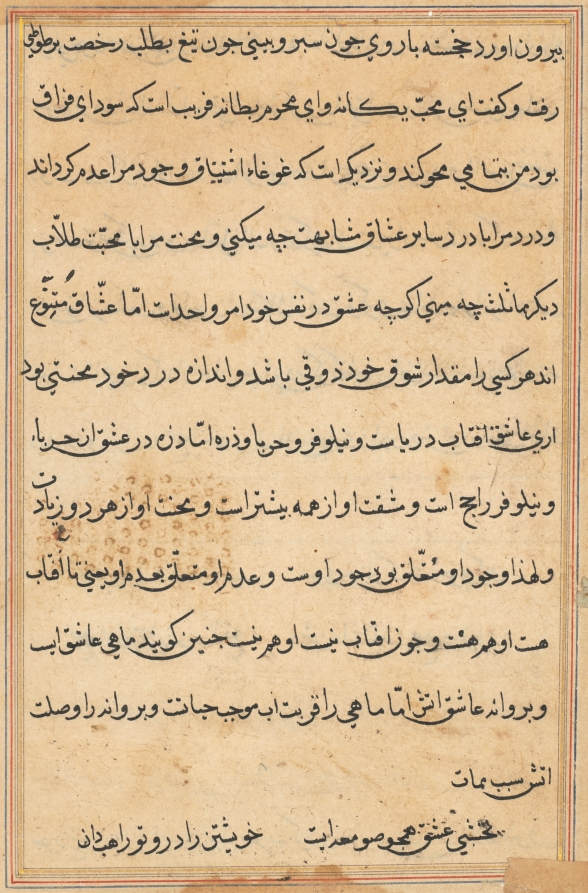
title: Page from Tales of a Parrot (Tuti-nama): text page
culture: Mughal India, court of Akbar (reigned 1556–1605)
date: c. 1560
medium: gum tempera, ink, and gold on paper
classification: Painting